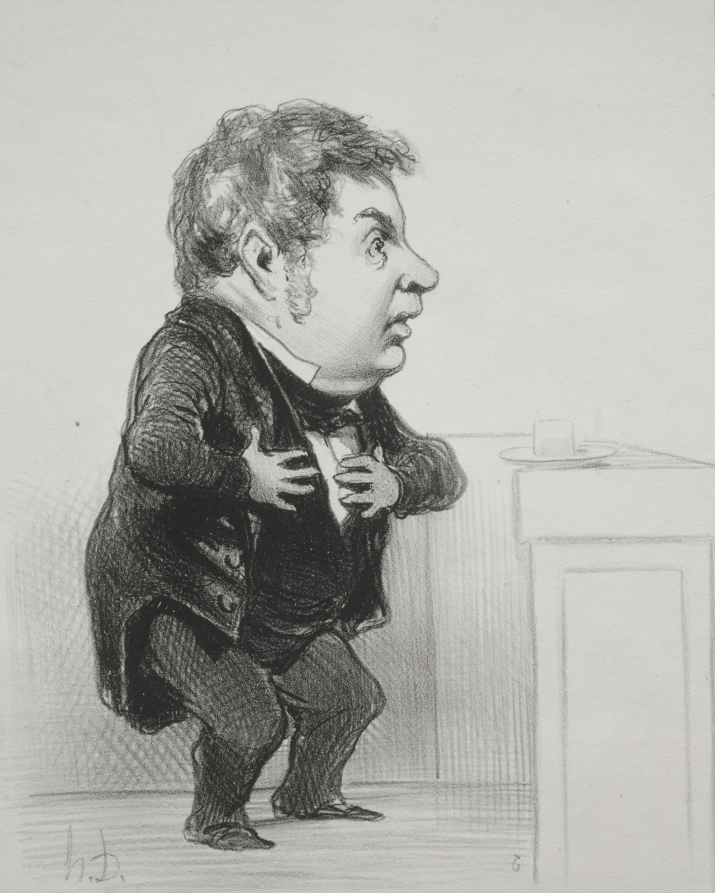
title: Michel Goudchaux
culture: France, 19th century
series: The Representatives Represented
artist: Honoré Daumier (French, 1808–1879)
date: 1849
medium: lithograph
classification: Print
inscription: Upper margin, pencil: HD. 90 / RRR ; lower margin, pencil: Goudchaux (seule connue) ; verso, in pencil: no 6-c / Michel Goudchaux, né à Nancy le 18 mars 1797 ; museum stamp ; black stamp: BLISS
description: This rare print was intended for the series The Representatives Represented but was never published.